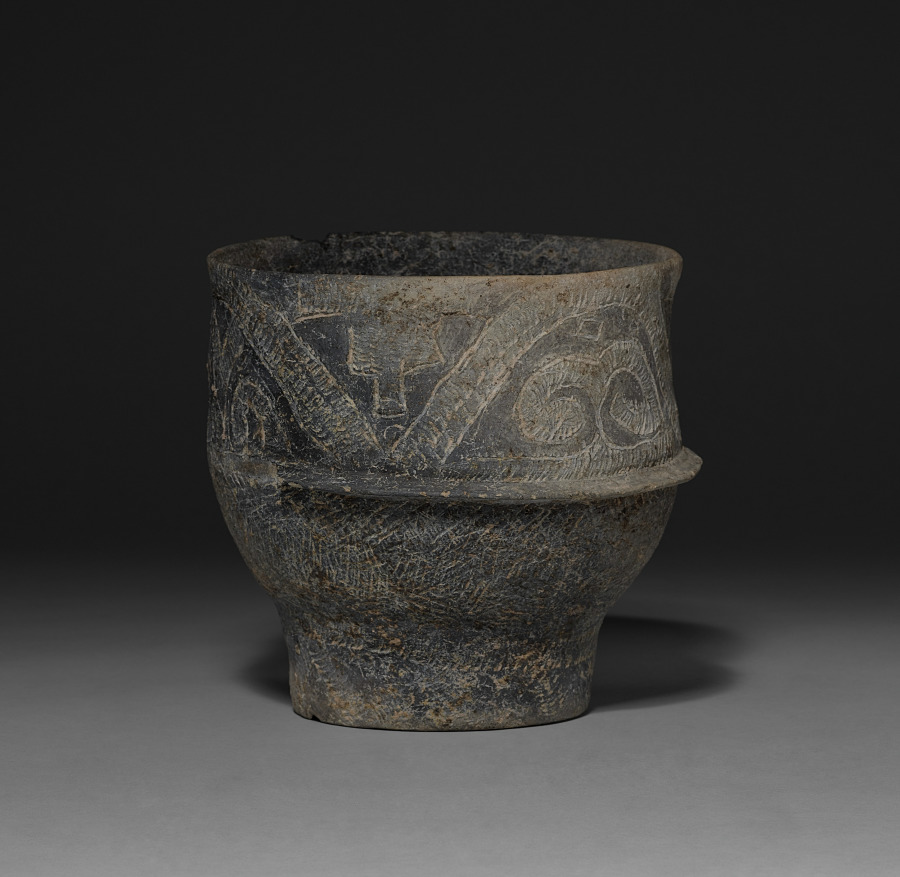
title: Jar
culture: Thailand, Ban Chiang, Neolithic Period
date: early 3000s BCE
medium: gray earthenware with incised decoration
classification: Ceramic